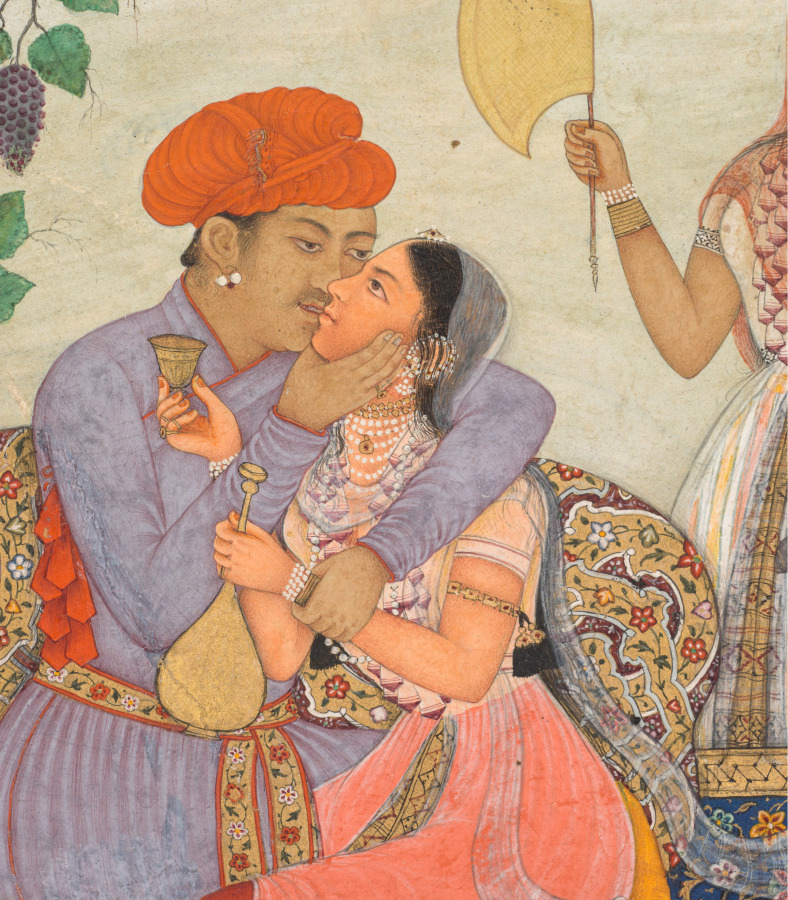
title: Lovers Embracing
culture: Mughal India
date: c. 1630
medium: Gum tempera and gold on paper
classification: Painting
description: The twining and coiling of the patterns on the carpet and large floor cushion mirror the interlaced bodies of the amorous couple. The clinging grapevine also references the wine they share from one cup. Such a carpet was not to be walked on, so the lovers do not wear shoes. It provides a luxurious furnishing to the intimate outdoor space. Here, the floral patterns evoke the pleasures of paradise. The textile patterns have been rendered with such precision that they appear like colorful enamel work or inlaid jewels. A covered golden box at right contains aromatic betel nut treats (paan) that freshen the breath.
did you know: Erotic metaphors in visual poetry: bees fly to blossoms as rain clouds approach.